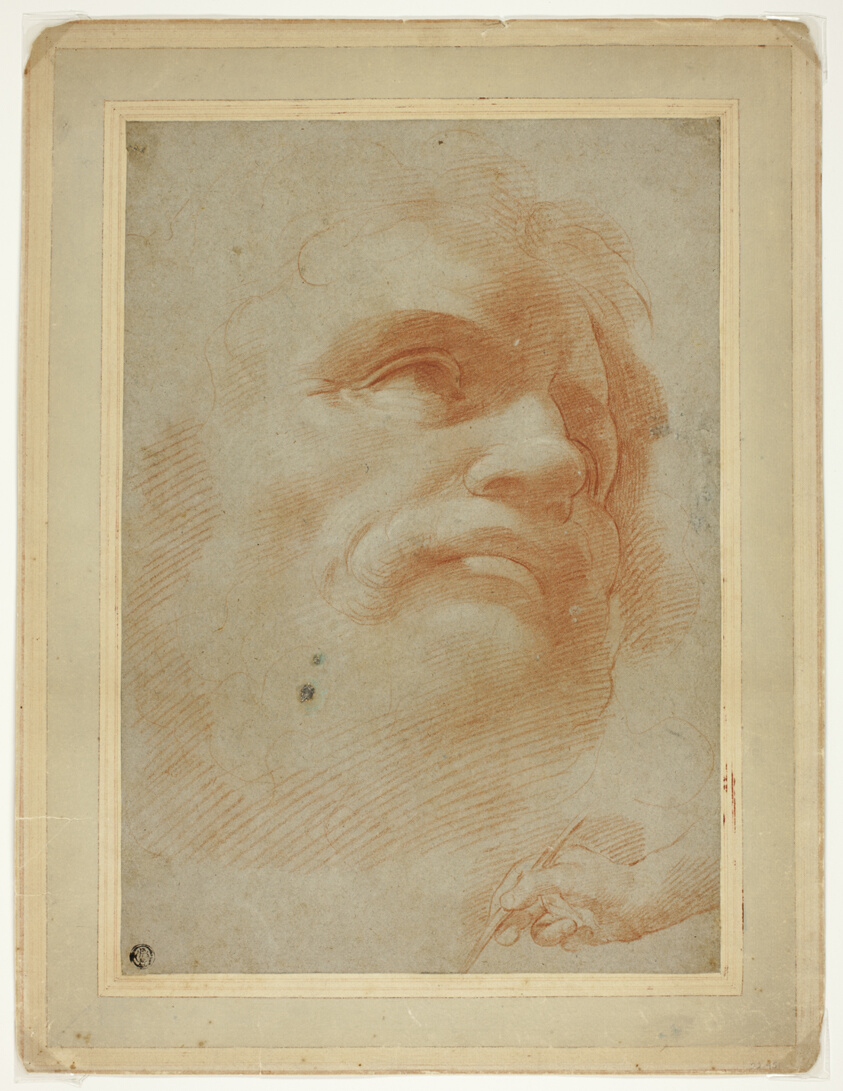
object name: Drawing and Watercolor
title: Male Head and Sketch of Right Hand Holding Stylus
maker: After Antonio Allegri, called Correggio; Italian, 1489?-1534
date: 1520/24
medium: Red chalk on blue laid paper, laid down on cream laid card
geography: Italy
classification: chalk; drawings (visual works); prints and drawing